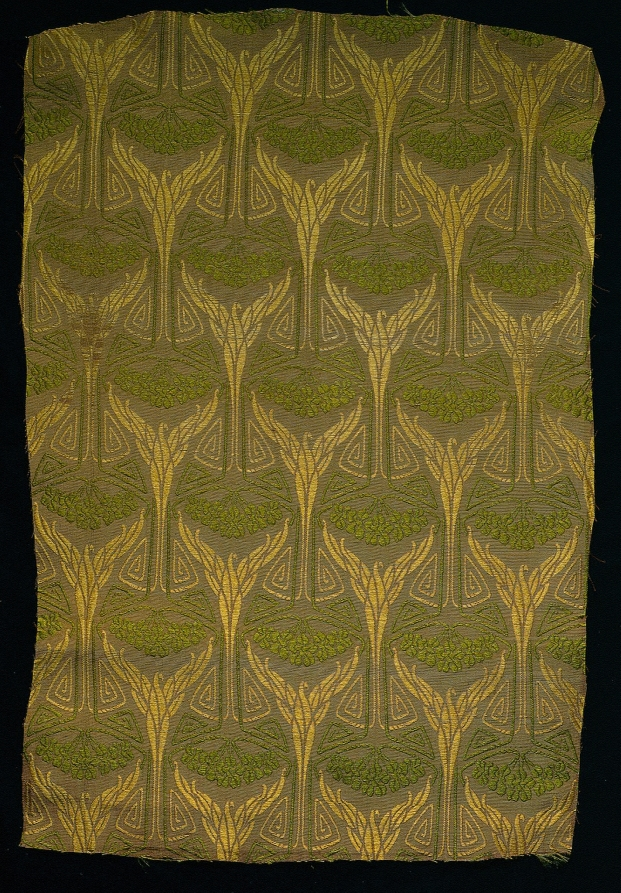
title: Silk Textile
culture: France, 20th century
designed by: Louis Majorelle (French, 1859–1926)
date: 1900–1910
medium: tabby, patterned with complementary weft floats; silk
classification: Textile